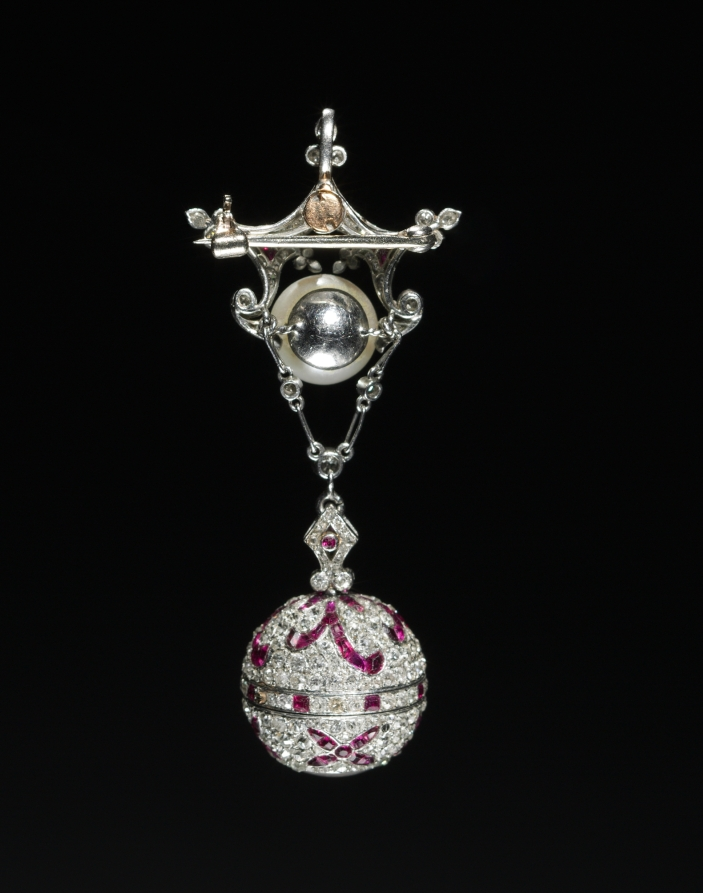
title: Pendant Watch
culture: America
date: c. 1890–1910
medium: diamonds, rubies, pearl, gold, platinum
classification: Jewelry